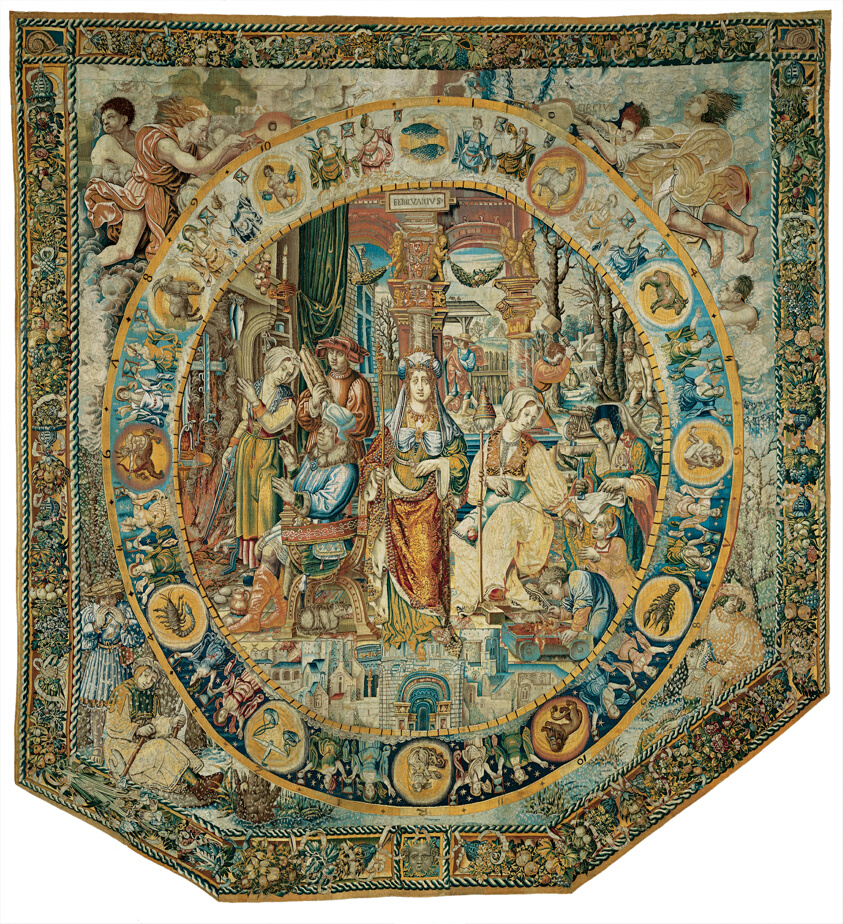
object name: Textile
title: February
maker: After a design by an unidentified Flemish artist in the circle of Bernard Van Orley (c. 1488-1541); Brussels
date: before 1528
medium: Wool and silk, slit and double interlocking tapestry weave. Warp: Count: 6 warps per cm; wool: S-ply of six Z-spun elements; ; diameters: 0.8–1.0 mm Weft: Count: varies from 26 to 60 wefts per cm; wool: S-ply of two Z-spun elements; pairs of S-ply of two Z-spun elements; diameters: 0.2–1.0 mm; silk: pairs of S-ply of two Z-twisted elements; diameters; 0.25–0.7 mm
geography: Brussels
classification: weaving - tapestry; textile